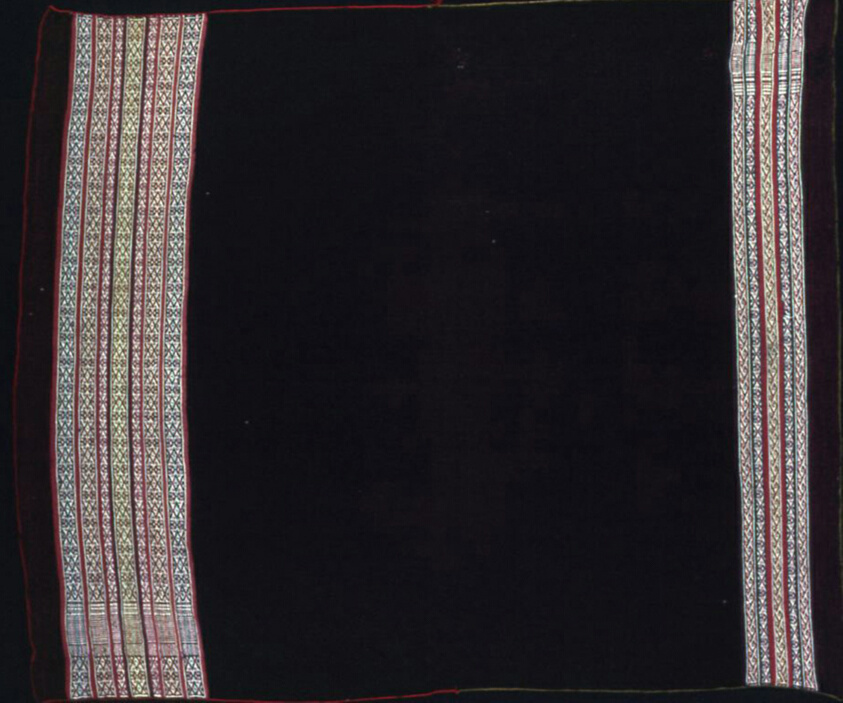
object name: Textile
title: Overskirt (Urku)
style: aymará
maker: Aymara (Bolivia, Oruro, Ladislao Cabrera, Pampa Aullagas region)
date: 1850/1900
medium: Wool, stripes of plain weave and three-color complementary warp weave; joined with darning stitches; edges overcast and interlaced in plain weave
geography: Bolivia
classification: textile; weaving